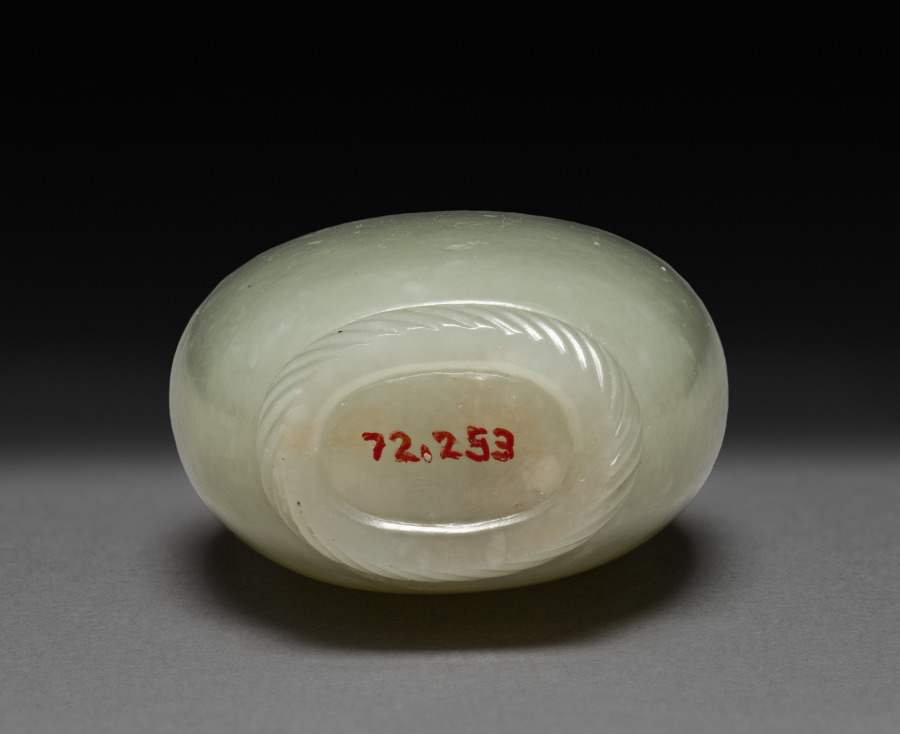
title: Bottle with Stopper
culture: China, Qing dynasty (1644–1911), Qianlong reign (1736–95)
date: 1736–95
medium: jade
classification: Jade